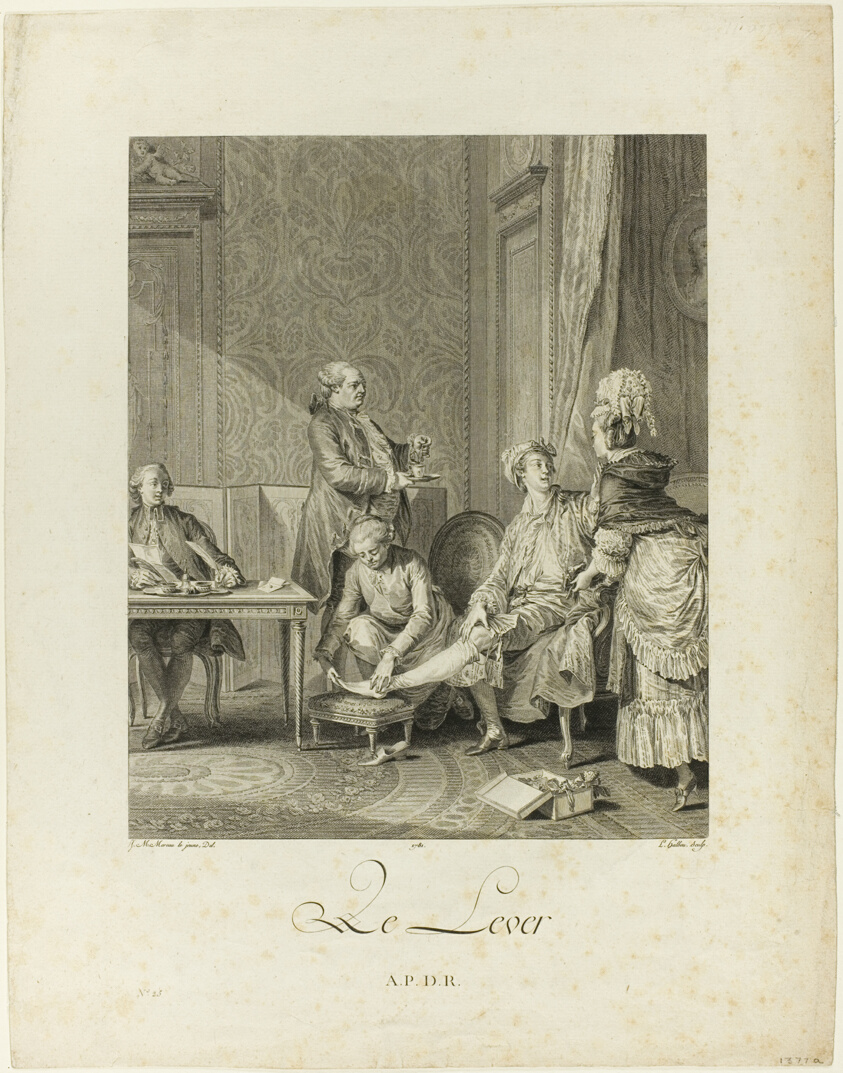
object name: Print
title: Rising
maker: Louis Michel Halbou (French, 1730-c. 1809); after Jean Michel Moreau (French, 1741-1814)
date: 1781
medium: Etching on paper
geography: France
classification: etching; print; prints and drawing